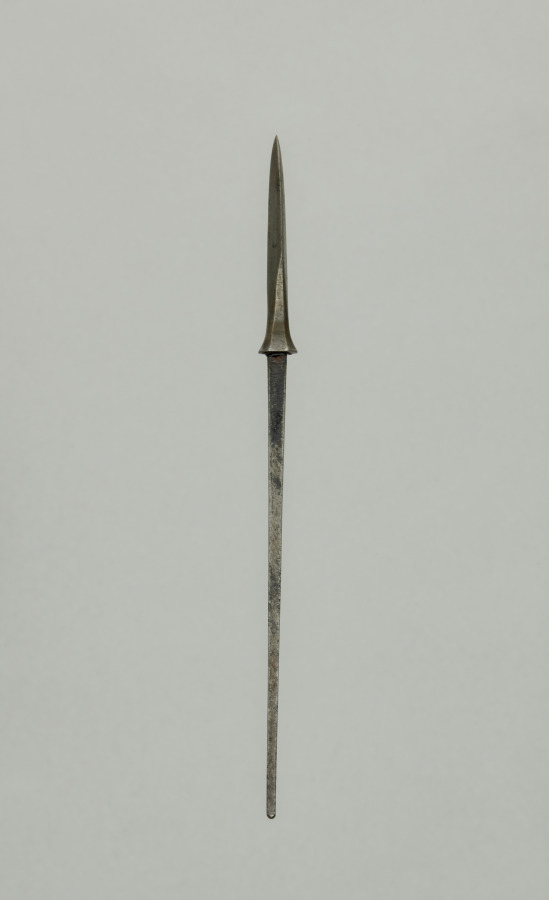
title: Arrow Point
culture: Japan, Edo period (1615–1868)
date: 1700s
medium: steel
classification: Arms and Armor